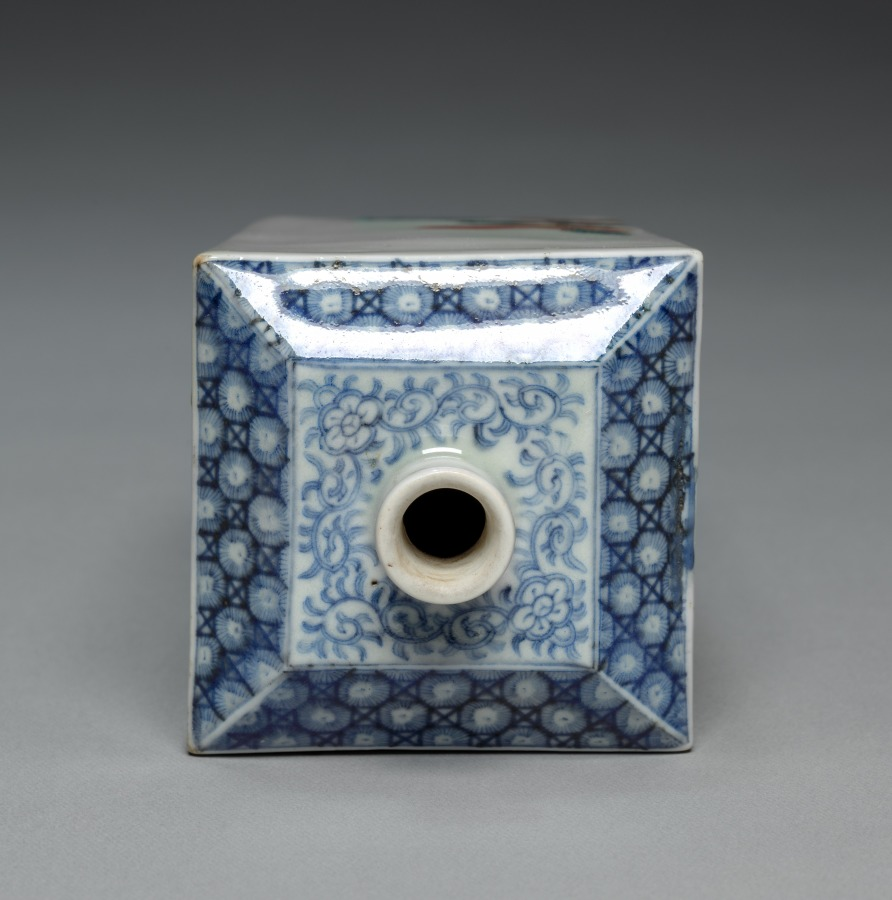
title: Bottle with Bird and Butterfly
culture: Japan, Edo period (1615–1868)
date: late 1600s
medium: porcelain with underglaze blue and overglaze color enamel and gold (Hizen ware, Ko-Imari type)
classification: Ceramic